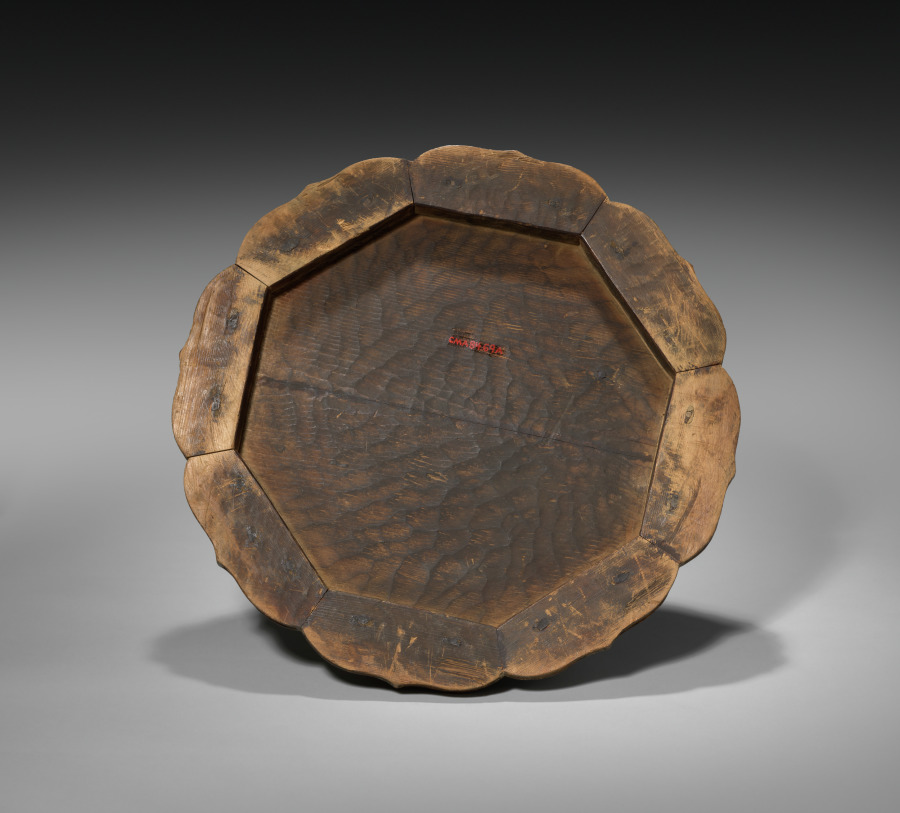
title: Standing Shokannon (lotus base)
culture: Japan, Heian period (794–1185)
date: 900s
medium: carved wood with polychromy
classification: Sculpture